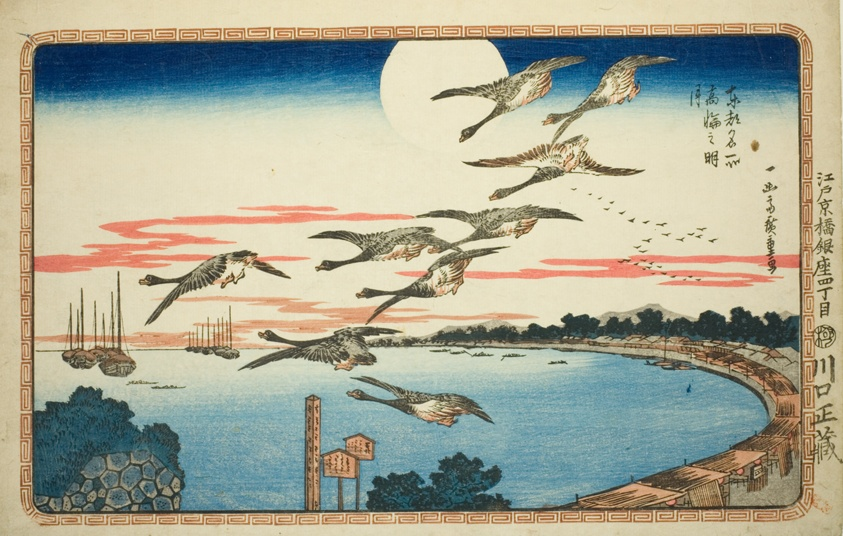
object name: Print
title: Full Moon at Takanawa (Takanawa no meigetsu), from the series "Famous Views of the Eastern Capital (Toto meisho)"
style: Japanese (culture or style)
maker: Utagawa Hiroshige 歌川 広重; Japanese, 1797-1858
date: c. 1831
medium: Color woodblock print; oban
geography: Japan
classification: woodblock print; print; asian art